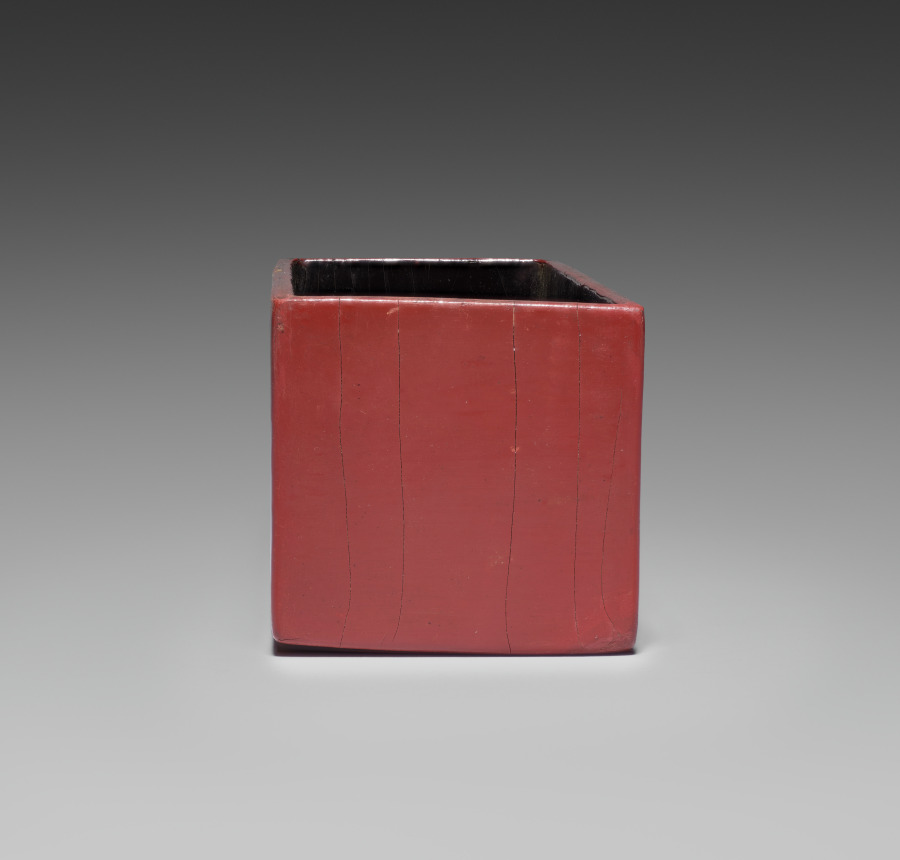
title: Drawer for a Tihong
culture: China, Ming dynasty (1368-1644), Wanli reign (1572-1620)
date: 1585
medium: carved cinnabar lacquer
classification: Lacquer